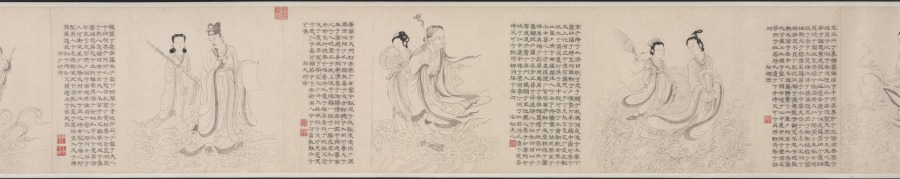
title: Nine Songs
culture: China, Yuan dynasty (1271-1368)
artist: Zhang Wo (Chinese, active c.1336–after 1364)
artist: Chu Huan (Chinese, active 1361)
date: 1361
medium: handscroll; ink on paper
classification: Painting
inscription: 7 colophons and 47 seals: 1 colophon, dated 1361, and 28 seals of Chu Huan 褚奐 (active c. 1361); 1 colophon, dated 1785, and 1 seal of Lu Shihua 陸時化 (1714-1779); 2 seals of Lu Yü-ch'ing (18th c.); 1 colophon, dated 1935, of Ye Gongchuo 葉恭綽 (1881-1968); 1 colophon, dated 1935, of Wu Hufan 吳湖帆(1894–1968); 1 colophon, dated 1938, and 1 seal of Wang Tongyu 王同愈 (1856-1941); 1 colophon, dated 1941, of Wu Huayuan 吳華源 (1893-1972); 1 colophon, dated 1942, and 9 seals of Xu Bangda 徐邦達 (1911–2012); 1 colophon, dated 1942, of Lang Jingshan 郎靜山 (1892-1995); 1 colophon, dated 1944, of Tang Yun 唐雲 (1910-1993); 6 seals of Wang Jiqian [C.C. Wang] 王季遷 (1907–2003).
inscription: Text of The Nine Songs written by Chu Huan at the end of each section.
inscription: 右離騷九歌圖，宋龍溟居士李公本，淮南張渥叔厚所畫妙絕當世。家藏請予書其辭目識于左。至正二十一年辛醜三月旦河南褚奐記。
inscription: Colophon by Lu Shihua 陸時化 (1714–1789): This scroll is fortunate to have been handed down from collections of the right people. Now, after 500 years, its condition is as good as when it was painted. I acquired this from Mr. Shen Guiyu [1673-1769], the President of the Board of Rites. The label is in his handwriting when he was 95 years old. I submit that Chu Huan (t. Shiwen) of the Yuan Dynasty was a native of Qiantang. His "seal" and li writings are in the style of Wu Rui. For example, in [Chu Kuei's] Ming ji lu [A list of masterpieces] is recorded the stele commemorating the restoration of the prefectural school of Kun-shan, the text of which was composed by Yang Weizhen in the twenty-first year of Zhizheng [1361]; and the calligraphy as well as the title in li style was by Chu Huan, who was at that time an assistant judge of the prefecture of Haining in the circuit of Hangzhou. Zhang Wo's zi is Shuhou (叔厚). His literary name is Zhen Qisheng (贞期生). According to [Gu Ying's] Yu shan cao tang ya jii, he liked to paint in the bai-miao or the "pure delineation" style after the method of Li Longmian [Li Gonglin 李公麟], which finds no peer among the ancient masters. This is agreed upon [by Pei Ch'iung] in his Qing jiang zhi who praised [Zhang Wo] as being quite learned and well-versed in many branches of the arts, especially figure painting. Recorded by Lu Shihua [The mountain dweller], listening to the pine, in the twelfth month of the yisi year [1785].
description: Painted in the baimiao, or fine-line drawing style, this ancient work demonstrates the literati’s use of abstract calligraphic brushwork for self-expression. The subject of the “Nine Songs”—songs associated with shamanistic rituals in the ancient Chu kingdom—had traditionally provided artists with myths and legends that they could explore and reinterpret in their own works.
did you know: Divided into eleven sections, the scroll contains illustrations by painter Zhang Wu followed by a transcription of the relevant verse by calligrapher Chu Huan.